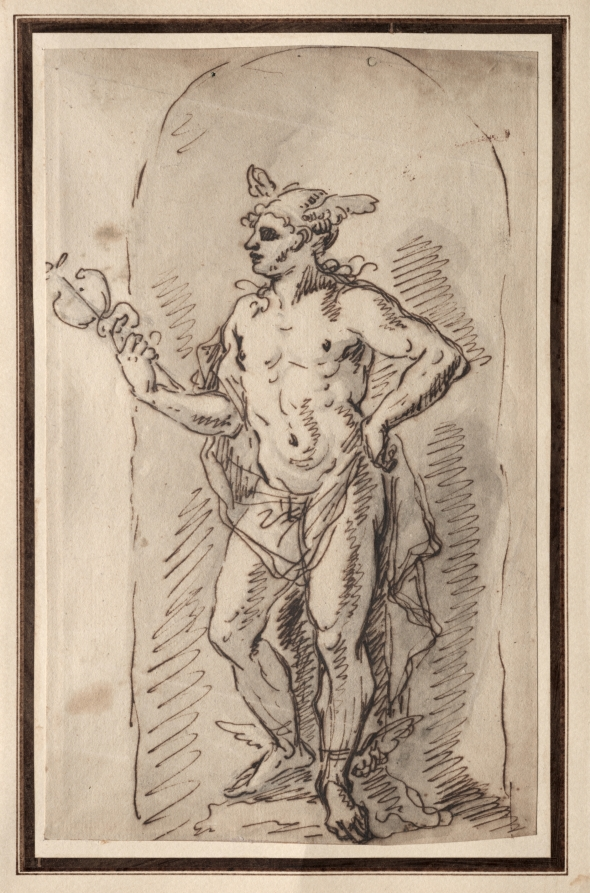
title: Mercury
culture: Italy, 18th century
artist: Anonymous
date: 18th century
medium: pen and brown ink and brush and gray wash over graphite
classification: Drawing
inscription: VERSO OF SECONDARY SUPPORT, upper center, in graphite: Flemish Mannerist / XVII c ; lower left, in graphite: 31093; lower left, in graphite: GANDOLFi